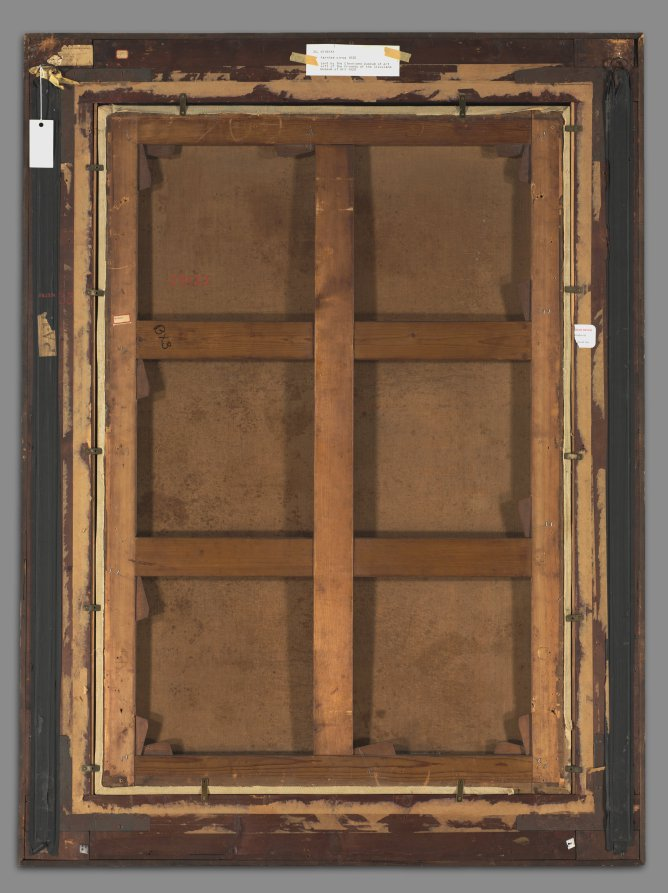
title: Allegorical Figure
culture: Italy, 17th century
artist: Bernardo Strozzi (Italian, 1581?-1644)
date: c. 1636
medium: oil on canvas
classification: Painting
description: During the 1630s, the Genoese artist Bernardo Strozzi painted a number of female figures representing various intellectual and artistic pursuits, reflecting the appeal of such allegories among learned patrons in northern Italy. Recent scholarship has convincingly identified the subject of this painting as Minerva. The Roman goddess of war has put aside her armor for more contemplative pursuits; her upward gaze—as if seeking inspiration—recalls her other associations with wisdom, eloquence, and the arts.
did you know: The preparatory drawing for this painting is also in the collection of the Cleveland Museum of Art (1953.626).